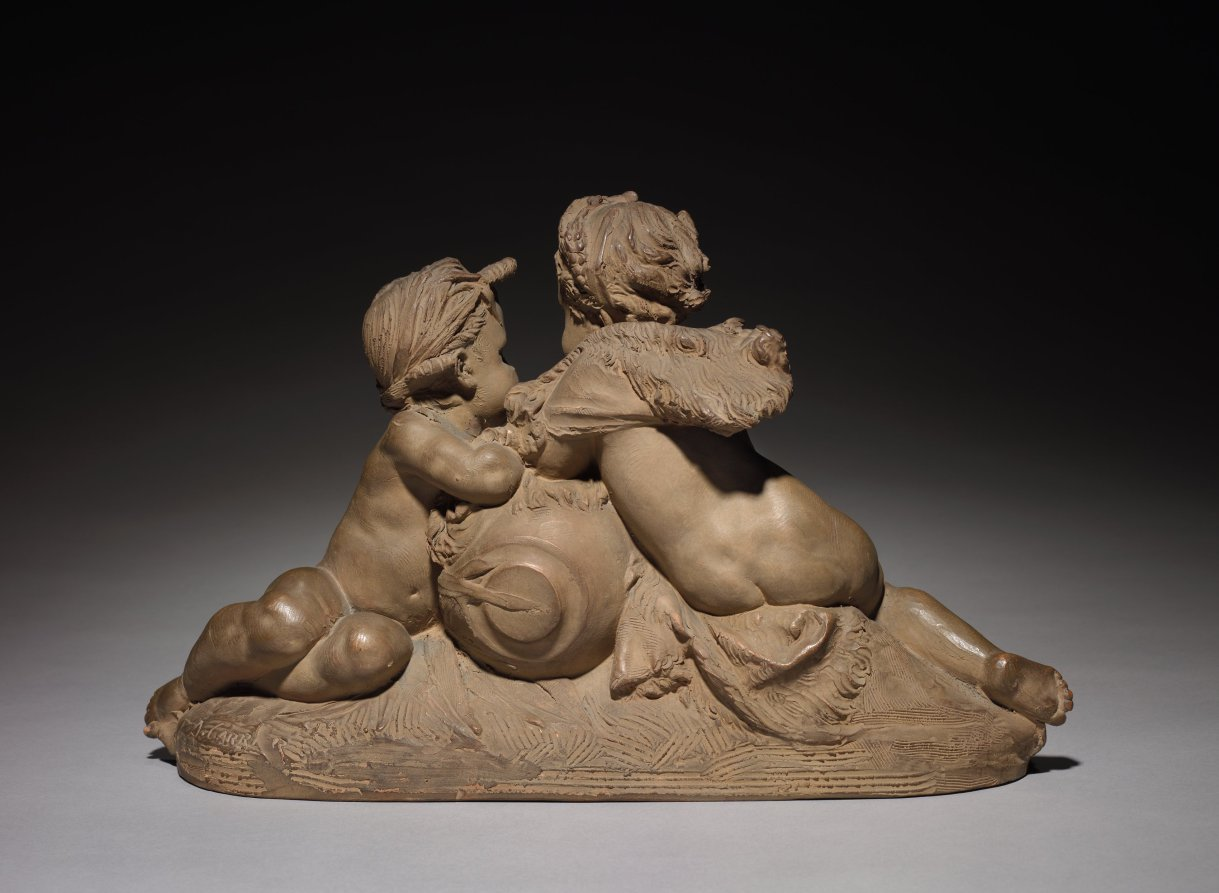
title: Putti Representing Earth and Water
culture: France, 19th century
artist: Albert-Ernest Carrier-Belleuse (French, 1824–1887)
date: 1865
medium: terracotta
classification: Sculpture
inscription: Signed near right corner: "A. Carrier (letter 'E' smeared)"; inscribed in pencil on upper surface of wooden base: "#2268" and "Henschel"; inscribed in pencil on bottom of wood base: "2268" and "Made-in-France"